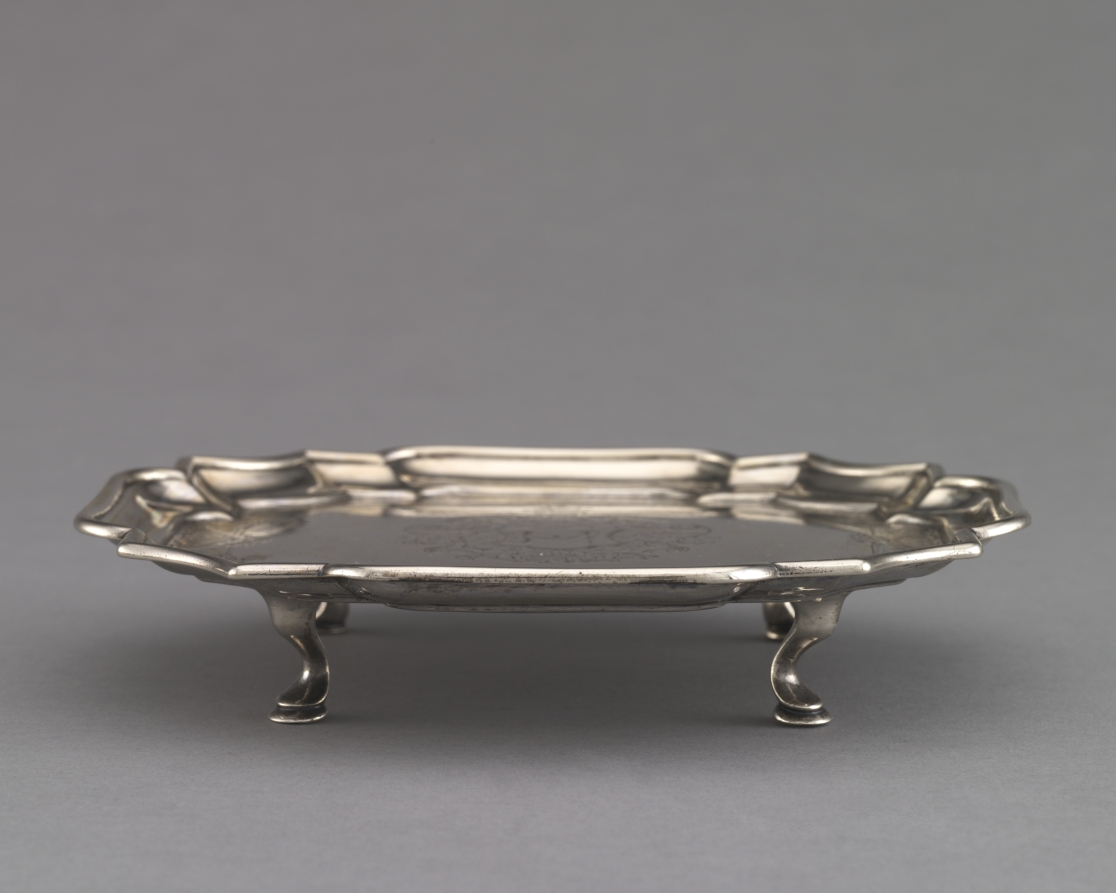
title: Salver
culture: America, Massachusetts, Boston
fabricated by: Jacob Hurd (American, 1702–1758)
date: 1740–50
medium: silver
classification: Silver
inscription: engraved: H over A + T over 1750 in shaded block letters underneath each salver.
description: The coat of arms is that of the Hastings family, the original owners of these serving pieces.